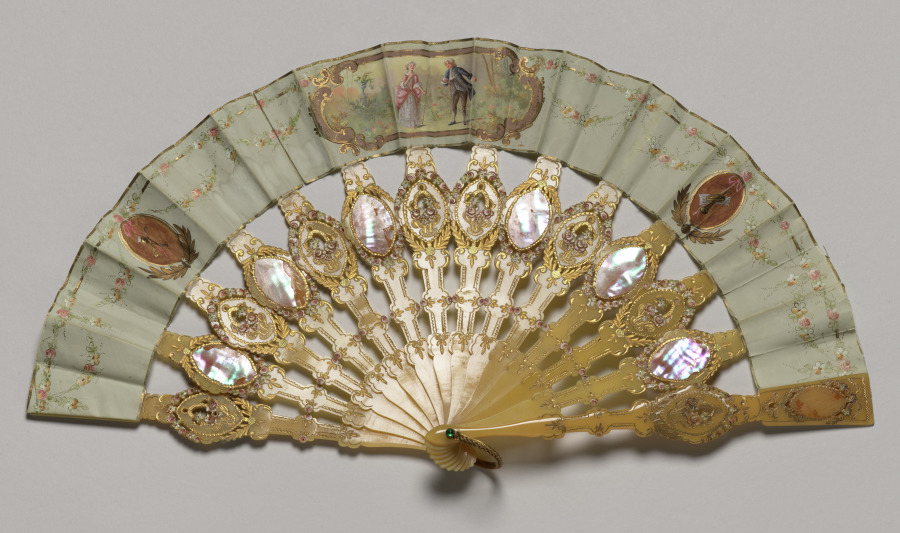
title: Fan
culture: Europe, 19th century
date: 1850–1899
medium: celluloid with gold leaf and paint, mother-of-pearl, painted and gilt silk, gilt copper alloy with green glass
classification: Ceramic